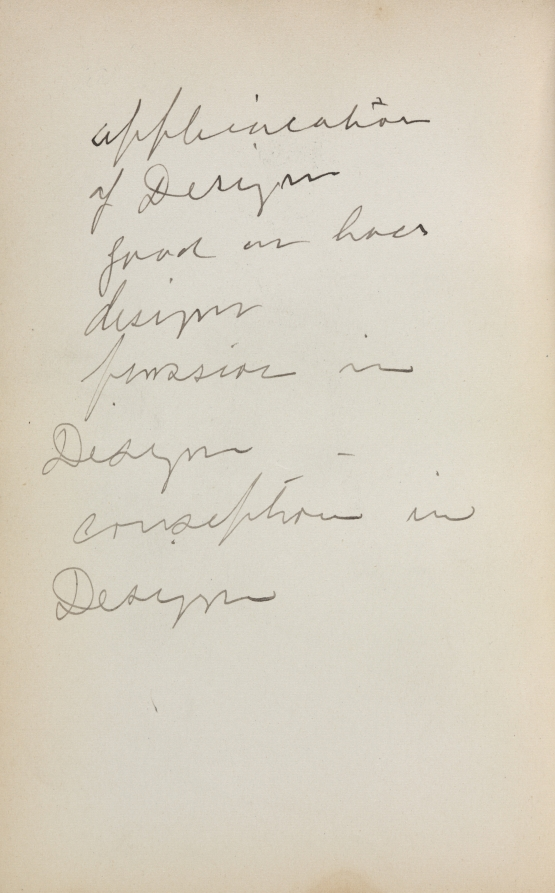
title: Italian Sketchbook: Notes (page 239)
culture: America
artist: Maurice Prendergast (American, born Newfoundland [now Canada], 1858–1924)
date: 1898–1899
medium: pencil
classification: Bound Volume